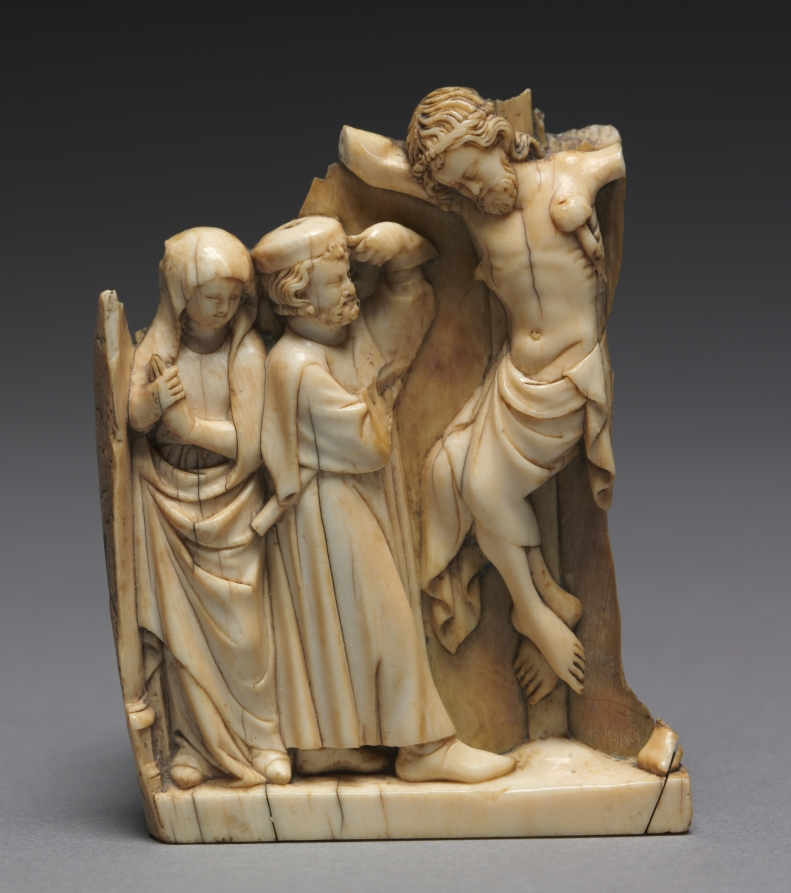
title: The Crucifixion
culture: France, Paris?, Gothic period, late 13th-early 14th century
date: c. 1290–1320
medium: ivory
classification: Ivory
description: Flanking the crucified Christ, the figures of Longinus and the Virgin appear on this fragment of an exquisitely carved ivory panel. Now lost are the figures of Stephaton and Saint John. However, Stephaton’s right foot and the vinegar-soaked sponge on a pole are still visible where the ivory breaks off.